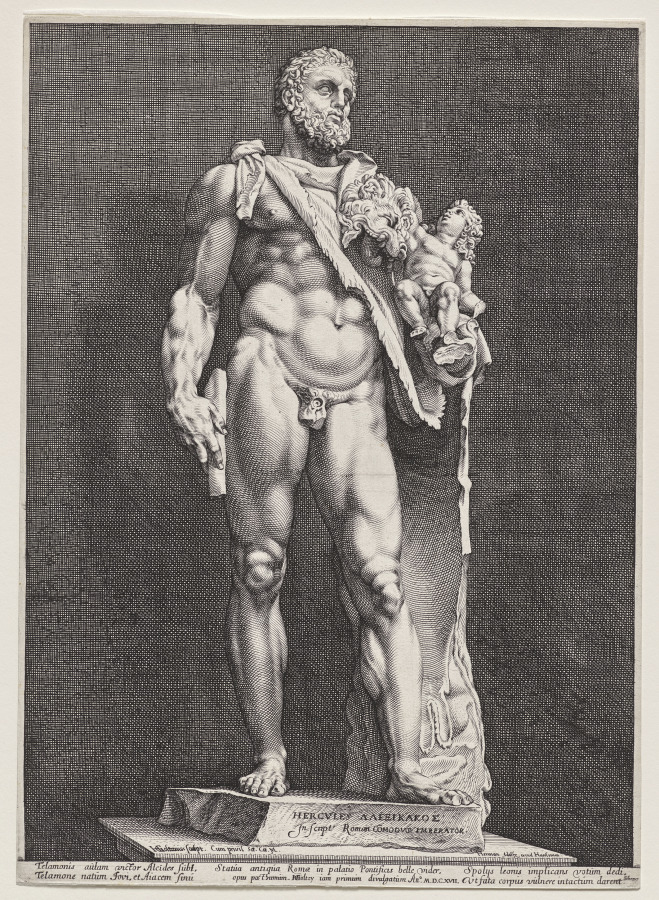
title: Hercules and Telephos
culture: Netherlands, 16th century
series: Three Famous Antique Roman Statues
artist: Hendrick Goltzius (Dutch, 1558–1617)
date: 1592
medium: engraving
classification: Print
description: Hendrick Goltzius was one of many late Renaissance artists who felt compelled to travel to Italy as part of his artistic training. He went with one purpose—to study antique sculpture. Goltzius made drawings on-site and then made engravings after his designs once he returned to Haarlem in 1591. He portrayed the Hercules Telephos from a low viewpoint to capture the awesome experience of first encountering the famous monument. It stands within a shadowed niche, which Goltzius filled with thousands of crossed engraved lines to create a dramatic recess that pushes the sculpture into the light. The engraving shows to excellent advantage the virtuosic technique that Goltzius developed, in which the swelling and tapering line exaggerates the heroic musculature of the figure.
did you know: The 2nd-century Hercules Telephos was unearthed in the Campo de’Fiori in Rome and was on view at the Belvedere Courtyard of the Vatican by the time Hendrick Goltzius visited the city.